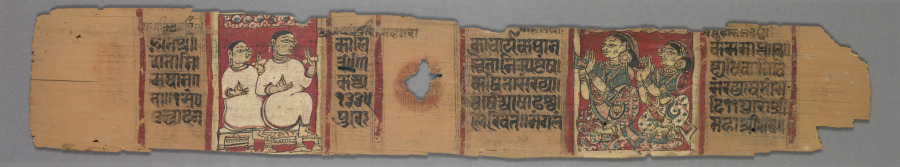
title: Two nuns teaching lay women, colophon page of folio 167 (recto) from a Kalpa-sutra and Story of Kalakacharya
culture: Western India, Gujarat, Palanpur (Prahladanapura)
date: 1278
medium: Gum tempera and ink on palm leaf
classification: Painting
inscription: iti śrī|kālikācārya-kathānaka samāpta || CHA || dātāni|trīṇicaitāni spaṣṭaṁ ṣa|ṣṭyadhidā |? nicai mathāna||kasya kathitā saṁkhyā | saṁkhyāvatāṁ ma tā || 1 saṁ° 1335 varṣe āṣāḍhaśu|di 11 gurau śrī- prahlādanapure | likhitaṁ || maṁgalaṁ mahāśrīḥ || CHA ||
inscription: [[Left painting, left caption]] Praḥ Matisuṃdariḥ (?)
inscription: [[Left painting, right caption]] Śrī Jayasuṃdari (?) Mahattarā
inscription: [[Right painting, left caption]] (indistinct)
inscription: [[Right painting, right caption]] Vahmahasala (?) Devi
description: Wearing white billowing monastic robes, the two nuns contrast with the beautifully adorned laywomen, who wear elaborately patterned textiles and jewelry. Jains commissioned illuminated manuscripts as a way to accrue religious merit, and they would have images of themselves at prayer inserted into the image cycles like this as signs of their patronage.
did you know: Small captions give the names of the figures; the larger nun is identified as the female leader (mahattarā).